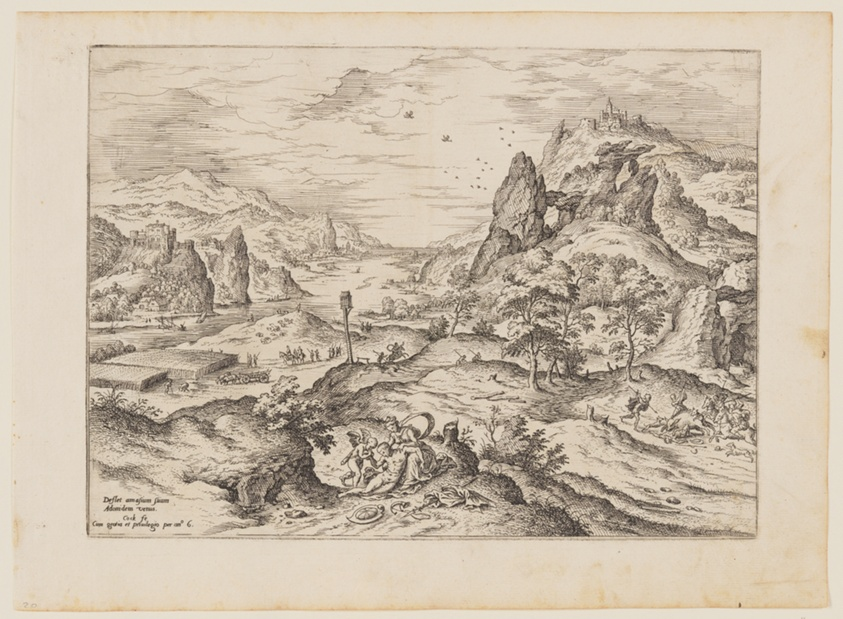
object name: Print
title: Venus and Adonis, from Landscapes with Biblical and Mythological Scenes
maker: Hieronymus Cock (Netherlandish, c. 1510–1570); after Matthys Cock (Netherlandish, c. 1505-1548)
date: 1558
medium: Etching on ivory laid paper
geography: Netherlands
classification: etching; paper; print; prints and drawing